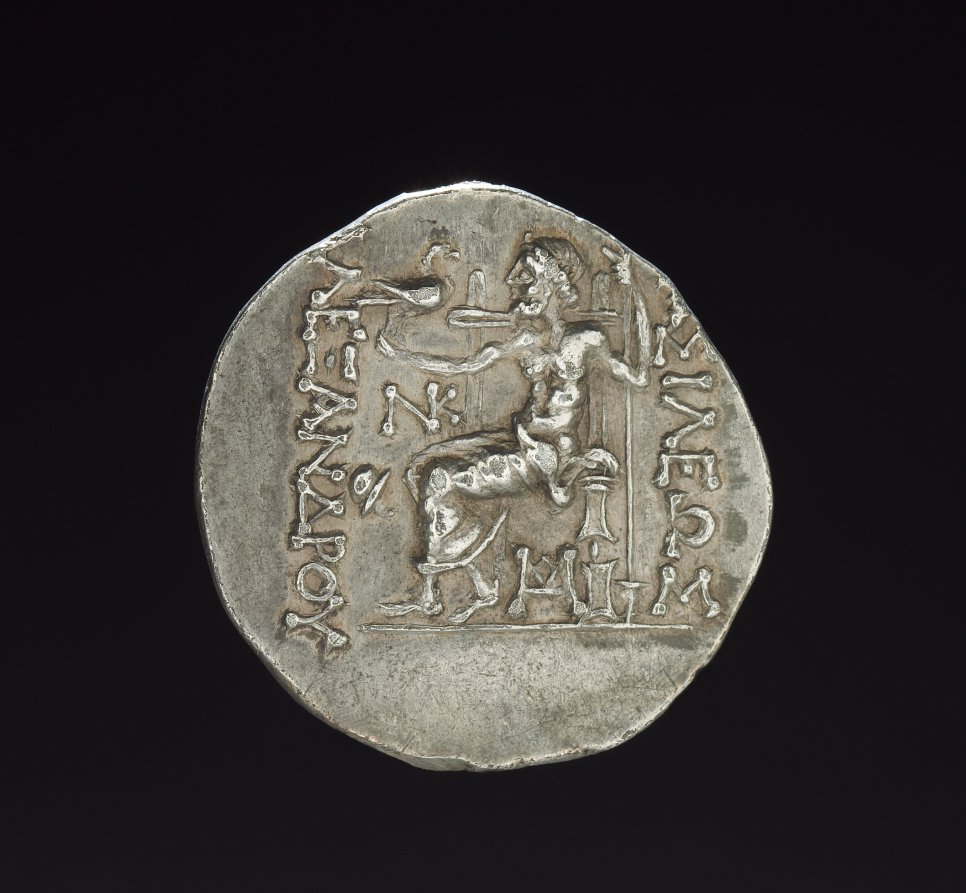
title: Indo-Greek Coin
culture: Afghanistan, Bactria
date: 200–1 BCE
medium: silver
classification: Silver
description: After Alexander of Macedon succeeded in conquering Egypt and Persia in 331 BC, his ambition to rule the known world led him further east across Bactria in Afghanistan, through the Hindu Kush mountain pass, and into India. There he succeeded in defeating all the local kings of the region until his men, on the brink of mutiny, insisted that they return to Greece. Alexander left governors in charge of his territories, and after his death in 323 BC, his governors became independent kings, establishing Hellenistic cities and a Greek cultural base in the region, which lasted for almost 200 years. The posthumous portrait of Alexander on the front of this coin depicts him wearing the lion scalp. He identified with Hercules, the mortal who became a god as a result of his superhuman feats, including the defeat of the Nemean lion.